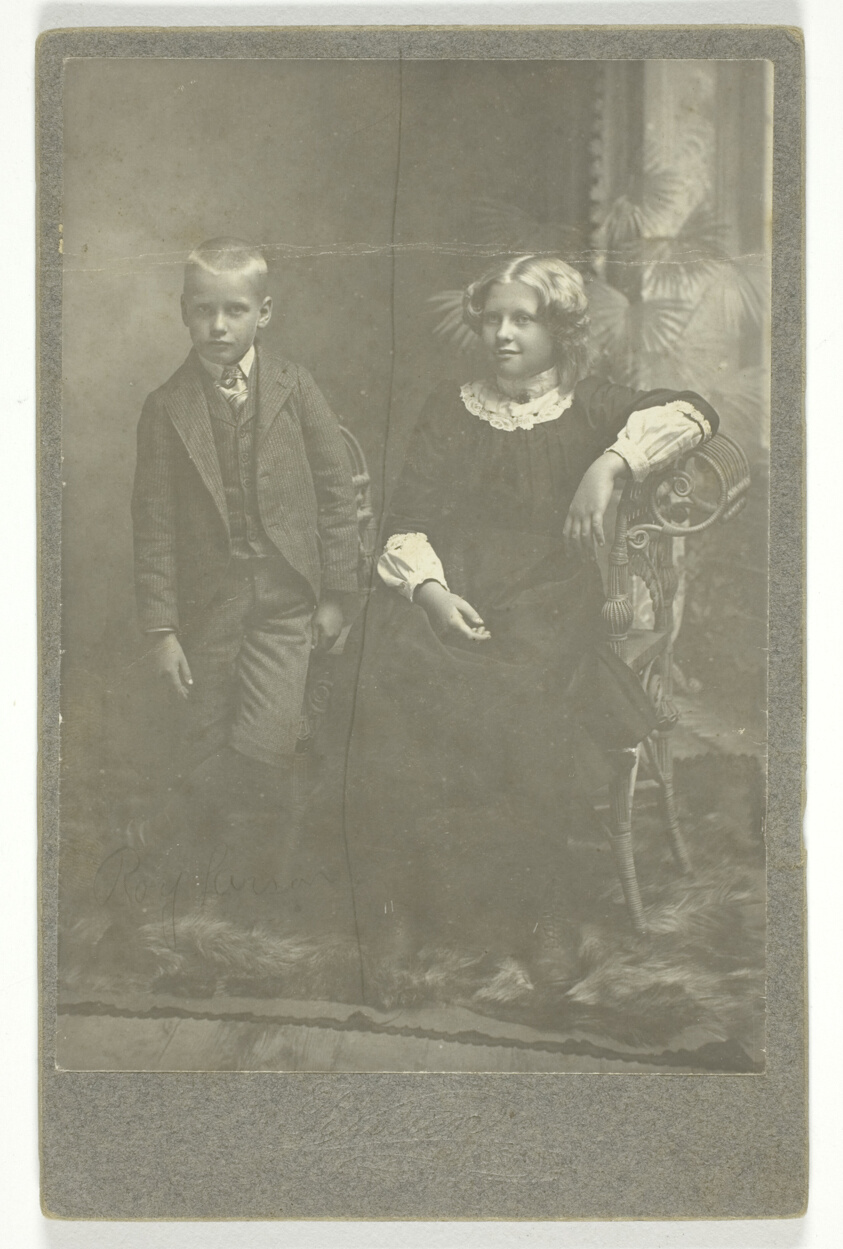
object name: Photograph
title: Untitled (boy and girl)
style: 19th century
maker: Artist unknown; 19th century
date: 1870/99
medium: Gelatin silver print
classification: photography; photograph